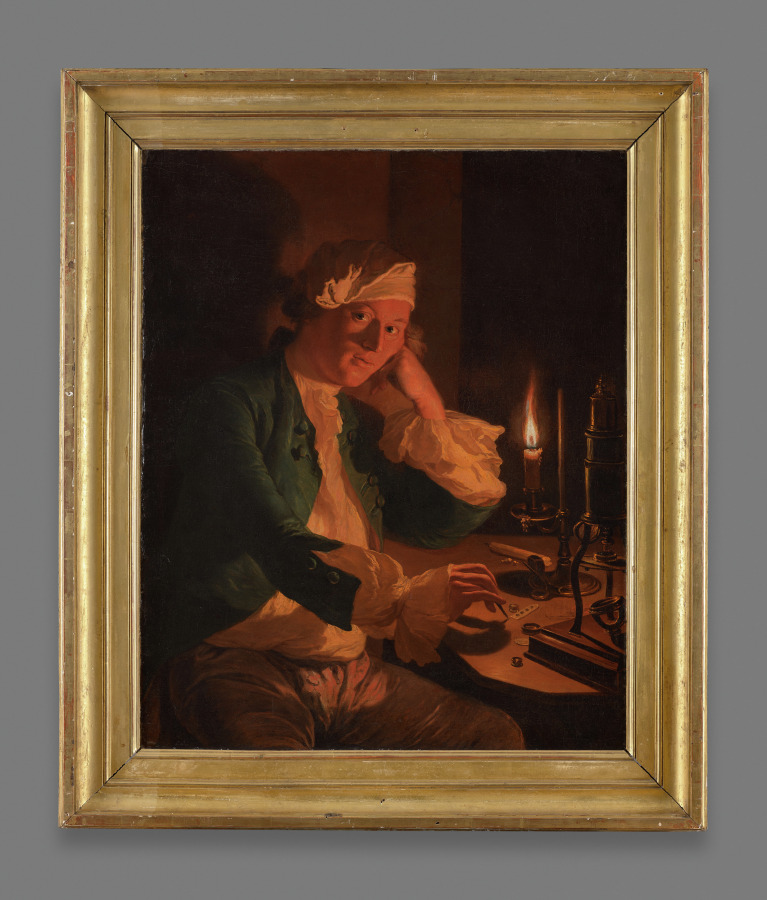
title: A Scientist Seated at a Desk by Candlelight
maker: Anna Dorothea Therbusch (German, 1721/22–1782)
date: 1755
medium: oil on canvas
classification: Painting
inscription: Peint par Anna Dorothea Therbusch Lisiewski 1755.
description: Candlelight subjects were unfashionable in Paris where Anna Dorothea Therbusch nonetheless submitted one for candidacy to the Royal Academy of Fine Arts. She was denied one of three positions allotted to women artists on the grounds that a woman could not have painted such an accomplished work. Therbusch agreed to be observed painting by the male committee and was admitted to membership on her second attempt.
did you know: Therbusch’s painting career began when she was in her 40s, after her children had grown.